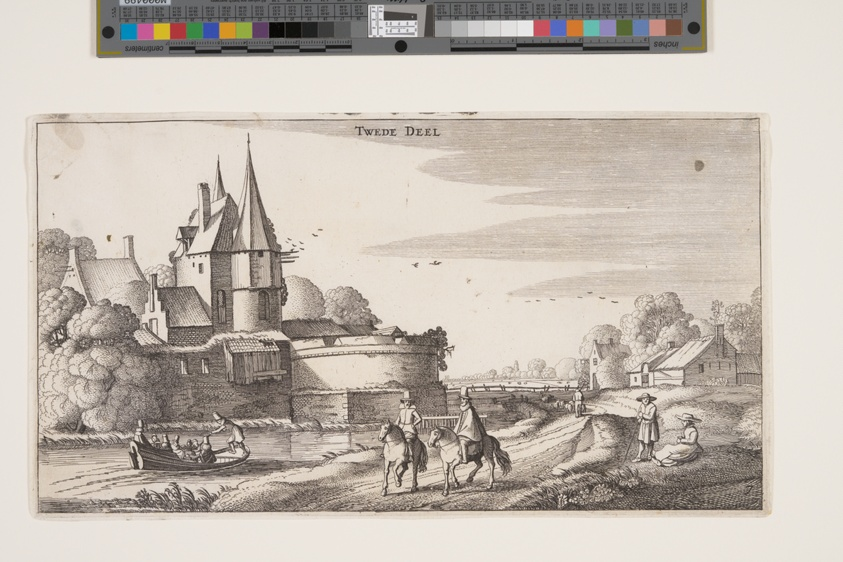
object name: Print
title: Country Road Along a Village with a Bastion, from Landscapes (Playsante Lantschappen)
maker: Attributed to Claes Jansz. Visscher II (Dutch, 1586-1652); after Jan van de Velde II (Dutch, c. 1593-1641)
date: c. 1641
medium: Etching, with engraving, on ivory laid paper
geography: Netherlands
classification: etching; paper; print; prints and drawing